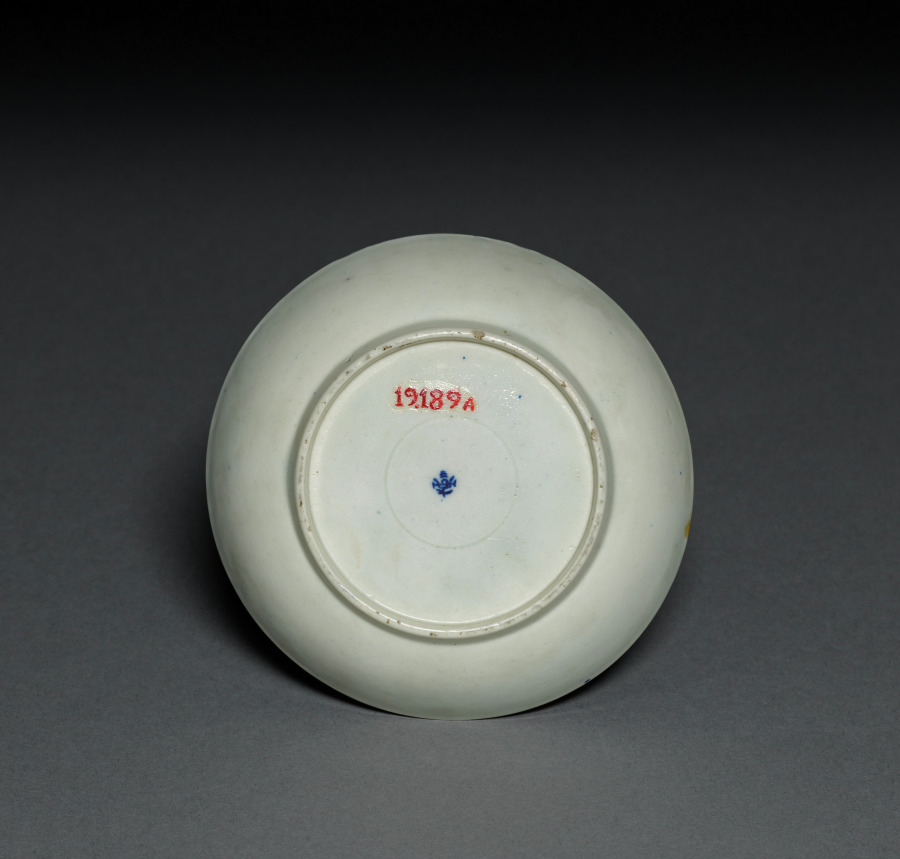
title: Saucer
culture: England, 18th century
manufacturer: Worcester Porcelain Factory (British, established 1751)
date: 1760–1780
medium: porcelain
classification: Ceramic